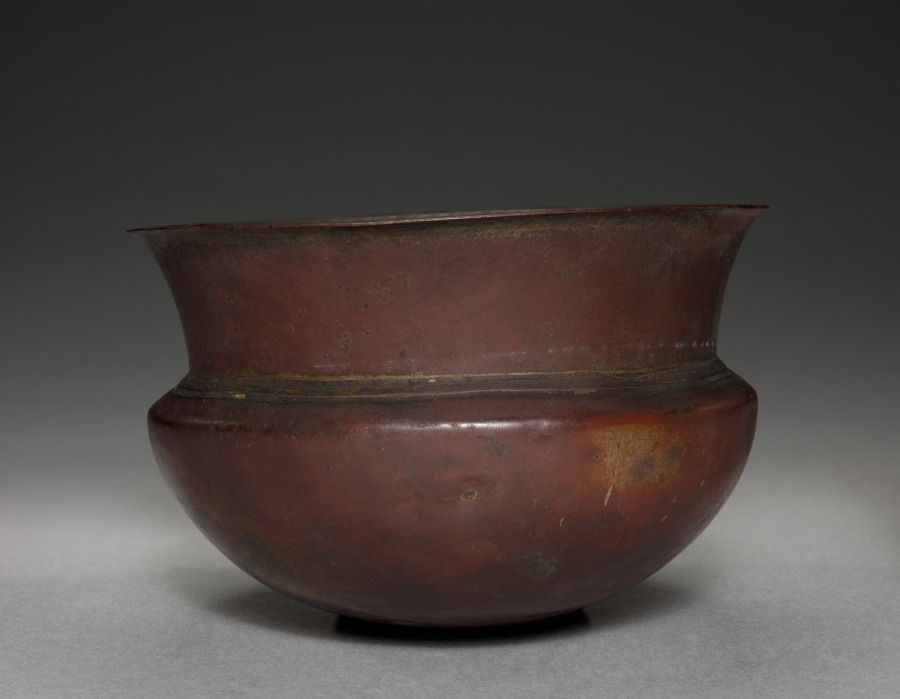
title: Deep Bowl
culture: Egypt, Greco-Roman period (332 BCE–395 CE), Ptolemaic dynasty (305–30 BCE) or modern forgery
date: 305–30 BCE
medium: bronze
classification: Vessels